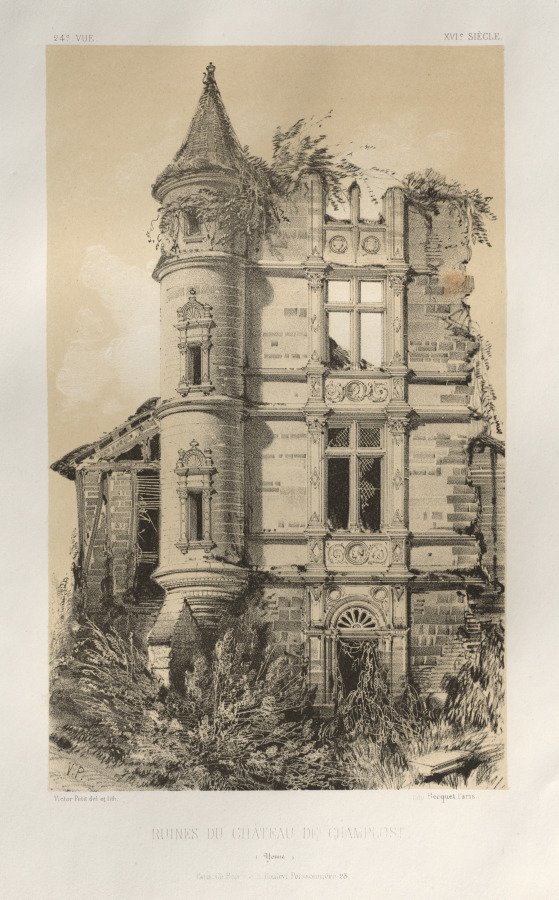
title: Architecture Pittoresque ou Monuments des xveme. Et xvieme. Siecles: Chateaux De France des XV et XVI Siecles: Pl. 24, Ruines Du Chateau De Champlost (Yonne)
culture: France, 19th century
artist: Victor Petit (French, 1817–1874)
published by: Charles Boivin (publisher and editor); Lith de Godard a Paris (printer)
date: published 1860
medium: lithograph with tint stone, from portfolio of 100 lithographs with tint stone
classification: Print